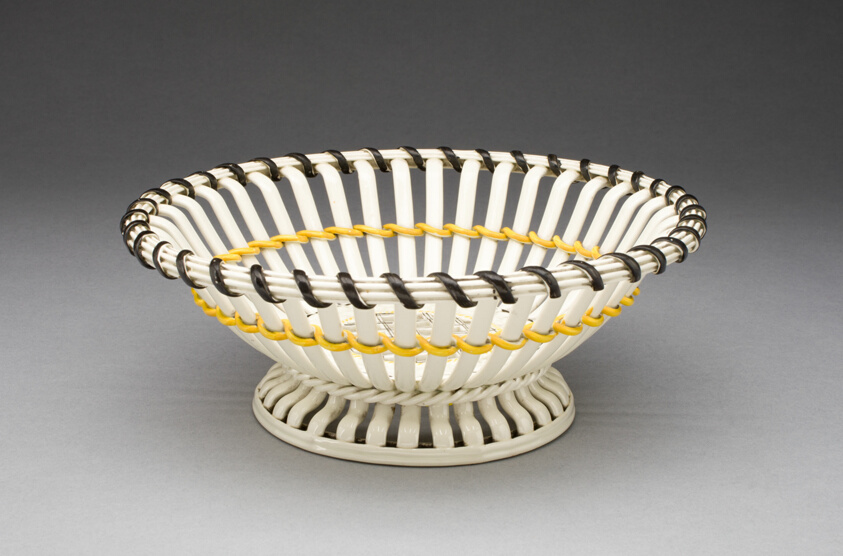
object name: Ceramics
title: Basket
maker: E. Mayer Pottery; English, Hanley, Staffordshire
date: 1780/90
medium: Lead-glazed earthenware (creamware)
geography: Staffordshire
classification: tableware; earthenware; european decorative arts; ceramics; creamware; lead-glazed earthenware